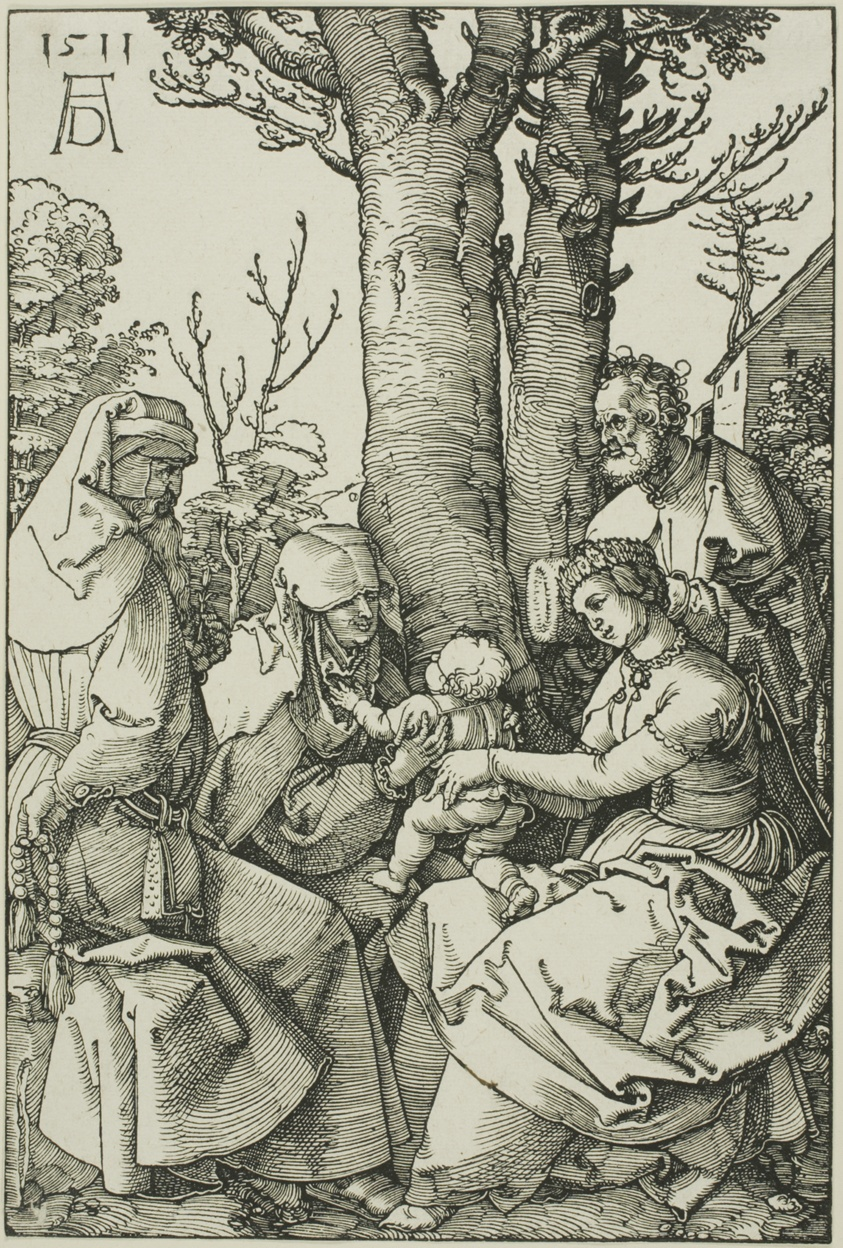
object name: Print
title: The Holy Family with Joachim and Saint Anne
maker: Albrecht Dürer (German, 1471-1528)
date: 1511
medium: Woodcut in black on ivory laid paper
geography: Germany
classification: woodcut; print; prints and drawing; paper